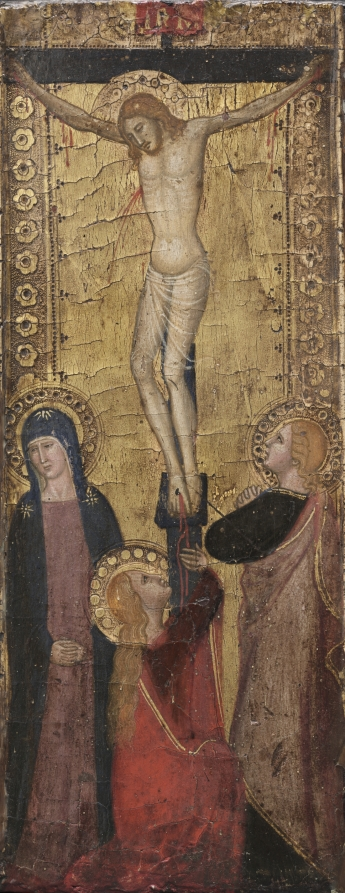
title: The Crucifixion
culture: Italy, Florence, 14th century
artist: Andrea da Firenze (Italian, 1379)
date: c. 1360s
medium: tempera and gold on wood (walnut)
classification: Painting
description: This panel was probably part of a small altarpiece of private devotion. The artist was active in Florence and Siena following the Black Death, which began in the late 1340s. His works, like others created during that troubled time, are charged with emotion.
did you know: This panel has been trimmed slightly at the bottom, cutting off the scene.